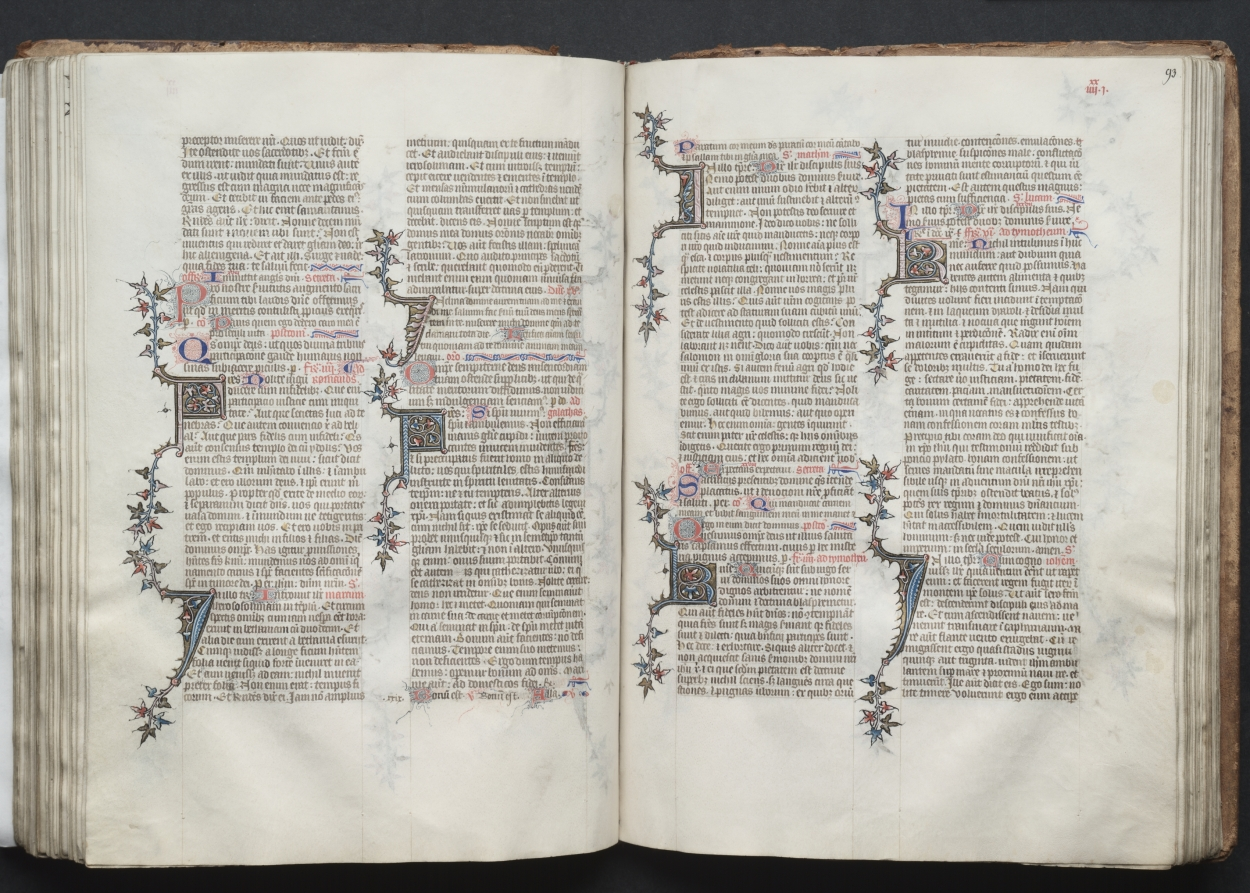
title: The Gotha Missal: Fol. 92v, Text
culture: France, Paris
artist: Master of the Boqueteaux (French)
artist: and Workshop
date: c. 1375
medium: ink, tempera, and gold on vellum; blind-tooled leather binding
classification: Bound Volume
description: The style and quality of this manuscript's decoration is typical of deluxe Parisian books made for aristocratic or royal patrons. Most of the book's decoration appears to be the work of the Master of the Boqueteaux, an artist active at the court of King Charles V (died 1380). His style was apparently shared by a number of book illuminators working in and around Paris. It is very possible that the Gotha Missal belonged to Charles V, but is not provable because the manuscript has no royal portraits and lacks a colophon. Given the book's magnificent decoration, however, it would seem that it was produced for a Valois prince, if not for the king himself. The manuscript receives its name from the German dukes of Gotha, its later owners.